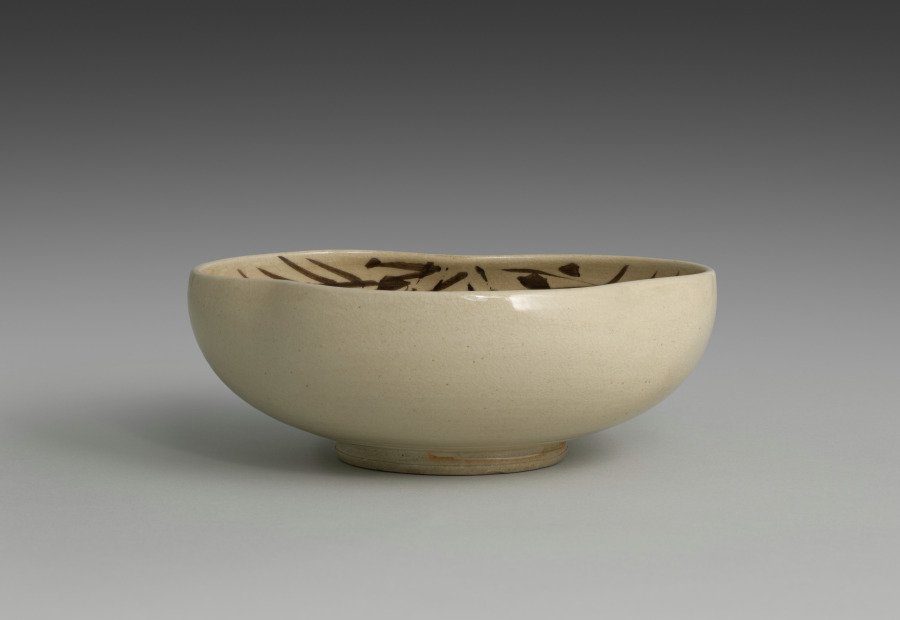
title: Pine-shaped Dish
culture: Japan, Meiji period (1868–1912)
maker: Seifū Yohei III (Japanese, 1851–1914)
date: 1893–1914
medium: Stoneware with underglaze iron oxide and crackled glaze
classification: Ceramic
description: The clever design on this stoneware Awata-style dish makes use of the interior and exterior surfaces to present a close-up view of pine needles on the branch painted in underglaze iron oxide. The branch is shown on the outside of one side of the dish, while the needles fan out across the inside. The entire dish, when seen from above, reveals a shape resembling the mushroom cap–like motif appearing in textile designs and in classical Japanese paintings called Yamato-e to represent pine trees.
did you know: Awata ware, named for the area of Kyoto where it was historically produced, is considered a subset of Kyoto ware. It is characterized by a very light brown body with a transparent crackled glaze.